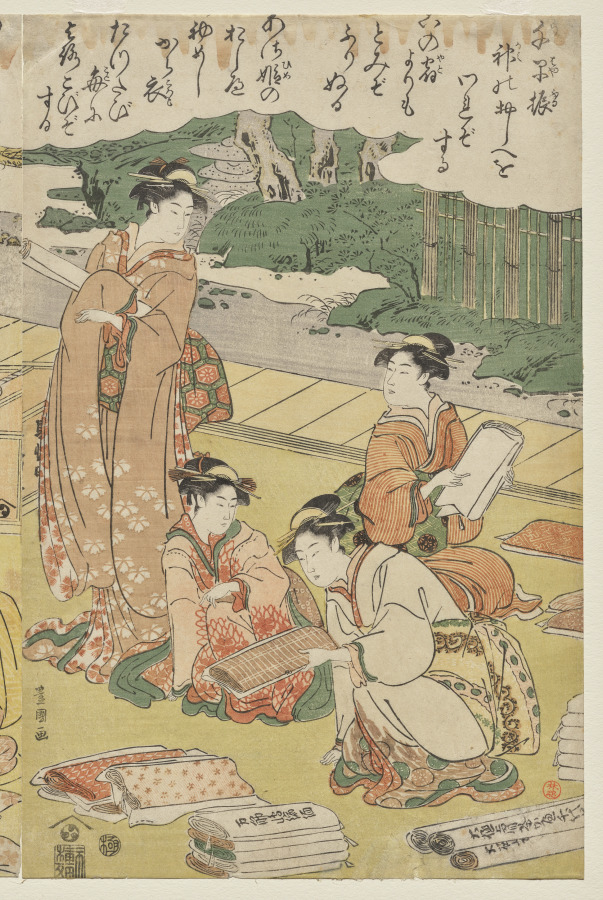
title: Women Making Clothing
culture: Japan, Edo period (1615–1868)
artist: Utagawa Toyokuni (Japanese, 1769–1825)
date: early 1790s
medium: color woodblock print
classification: Print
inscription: Signature: Toyokuni ga Publisher: Nishimuraya Yohachi (Eiju han, emblem) Censorship Seal: kiwame